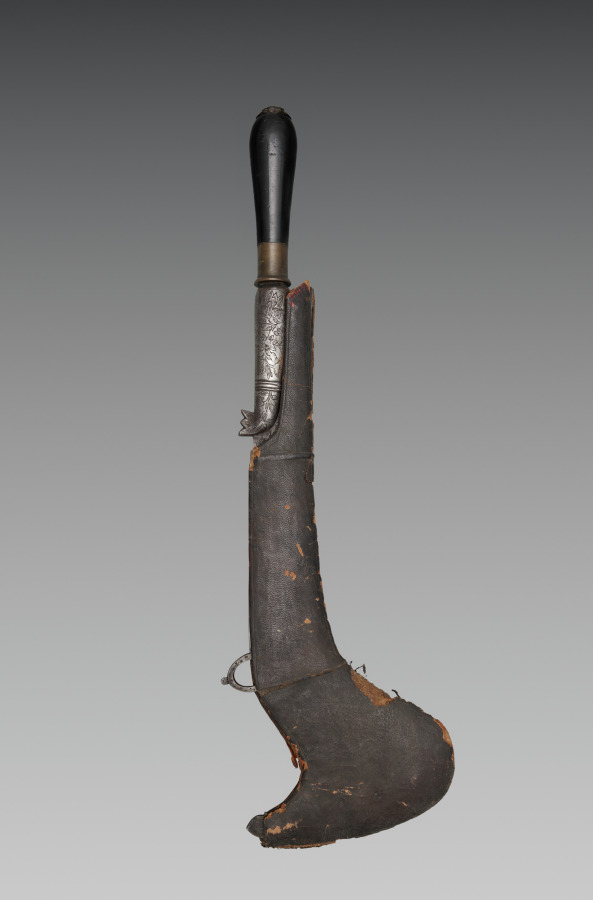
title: Knife or Axe (Kharga)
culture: Nepal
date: 1800s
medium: iron with wooden handle and leather scabbard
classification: Arms and Armor